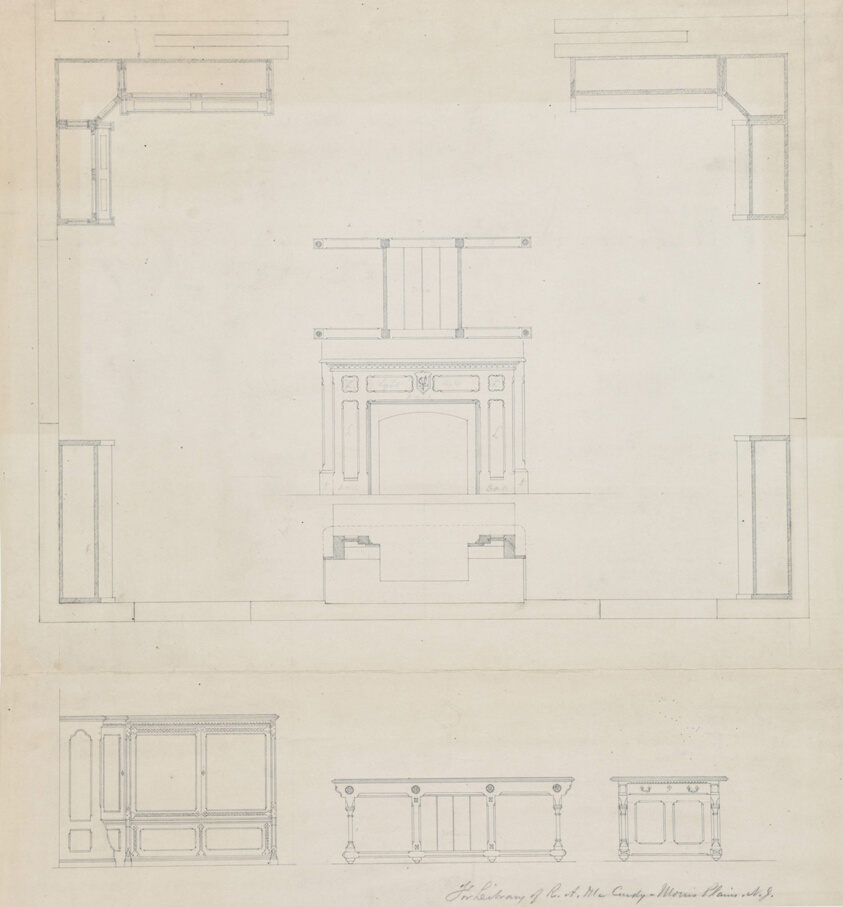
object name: Architectural Drawing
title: Library for R.A. McCurdy, Morris Plaines, New Jersey, Elevations of Mantel and Furniture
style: 19th century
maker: Peter Bonnett Wight (American, 1838–1925)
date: c. 1869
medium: Ink over graphite on paper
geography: Morris Plains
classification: architectural drawing; design drawing; architecture; elevation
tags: libraries, houses, drawing, design, architecture, elevation, mantles, furniture